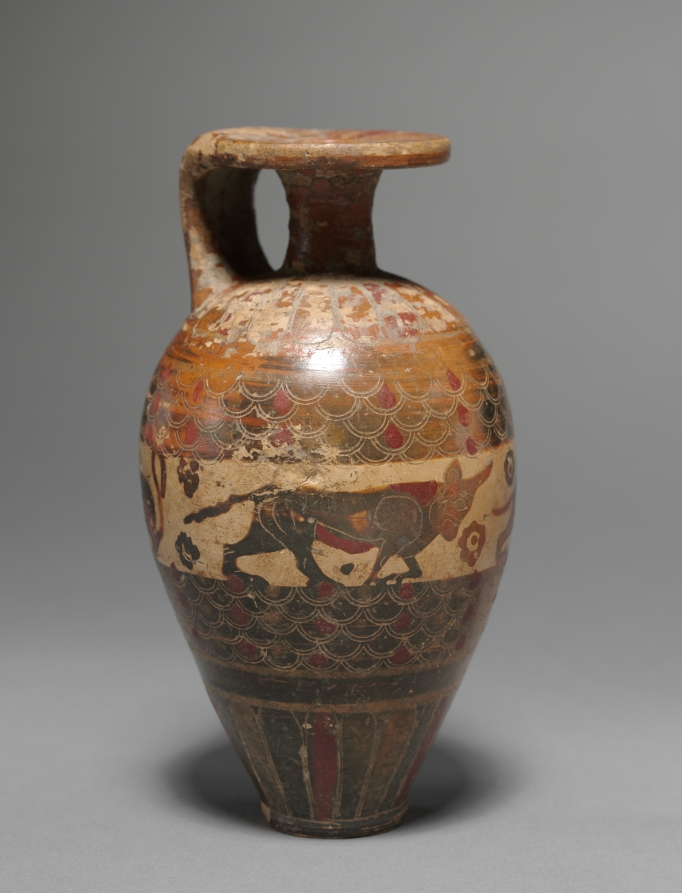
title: Protocorinthian (Early Black-Figure) Aryballos (Oil Flask): Animals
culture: Greek, Corinthian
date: c. 650–640 BCE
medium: ceramic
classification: Ceramic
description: Tongues encircle the rim, shoulder, and base of this small oil vessel, while two carefully incised bands of scales frame an animal frieze. Here, amid dot rosettes, are a bull, dog, and goat, all facing right, and a left-facing lion with head turned back. The black glaze has misfired red in many places, while added red enlivens numerous tongues, scales, and internal details.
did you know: Artists may have used a compass-like tool to create the intricate scale patterns.